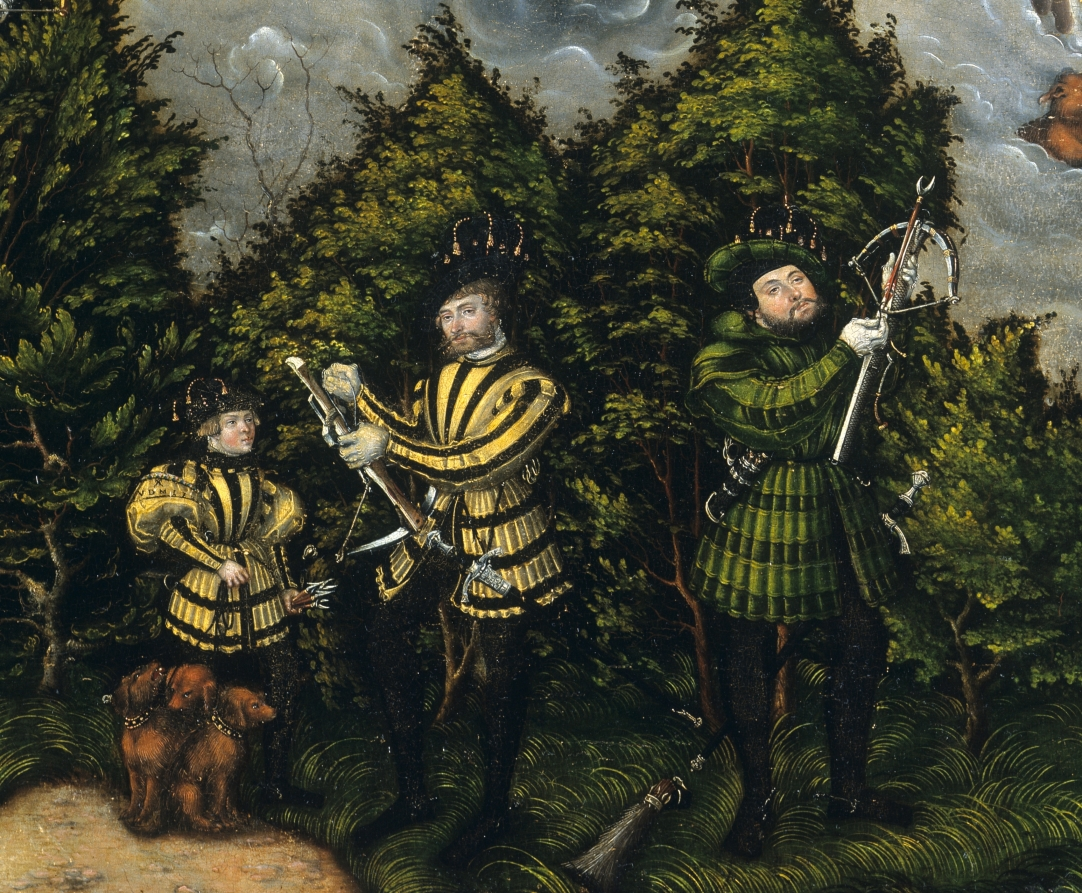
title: Hunting near Hartenfels Castle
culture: Germany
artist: Lucas Cranach (German, 1472–1553)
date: 1540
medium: oil, originally on wood, transferred to masonite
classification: Painting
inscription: Signed lower right on boat with a winged serpent, and dated: 1540 [inventory number, lower right: 1577]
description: The Protestant rulers of Saxony commissioned this animated hunt scene, set near their residence seen in the background, Hartenfels Castle (in eastern Germany). John Frederick the Magnanimous, in the bottom left corner, wears dark green hunting attire; he spans his crossbow and waits for his courtiers and dogs to chase a stag across the river. His wife, the Electress Sibylle, stands at right, poised to take the first ceremonial shot. The prince electors of Saxony were passionate practitioners of hunting with dogs—elaborate, highly rehearsed occasions, coordinated by the use of signals from hunting horns. Cranach dated this work and his signature is the winged snake at lower right. 1577 in the right corner is an inventory number.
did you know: Humans, dogs, and deer make up most of the creatures in this busy scene—but not all of them! Look closely at the background to spot a bear and three boars.